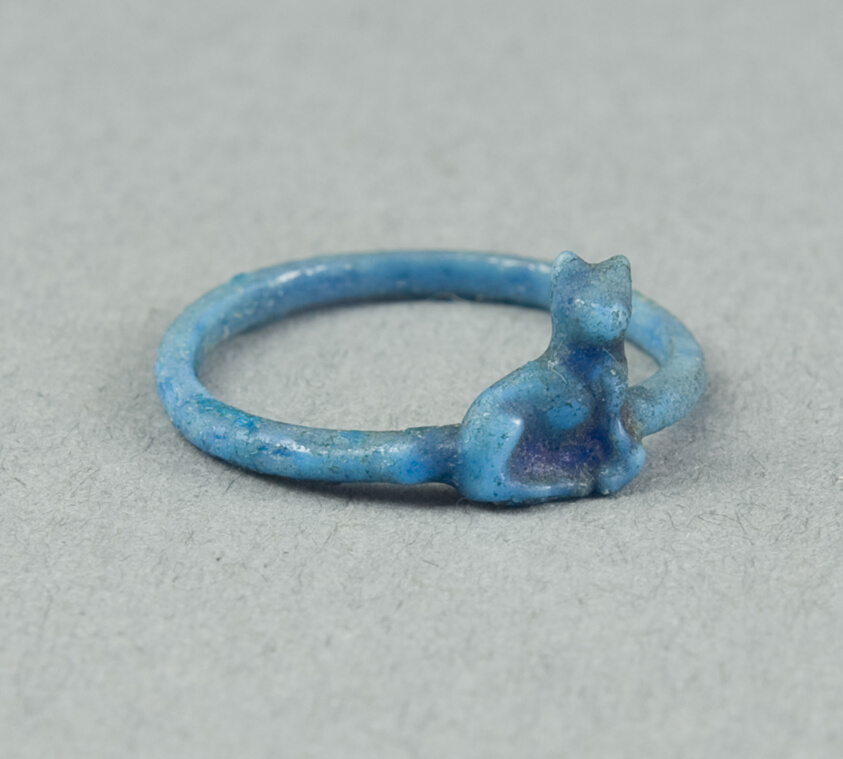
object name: Costume and Accessories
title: Ring: Figure of Seated Cat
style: egyptian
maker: Egyptian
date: New Kingdom, Dynasty 18 (about 1390 BCE)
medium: Faience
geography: Egypt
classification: ring (jewelry); ceramics; jewelry; ancient art; costume; faïence (composite material)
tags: cat